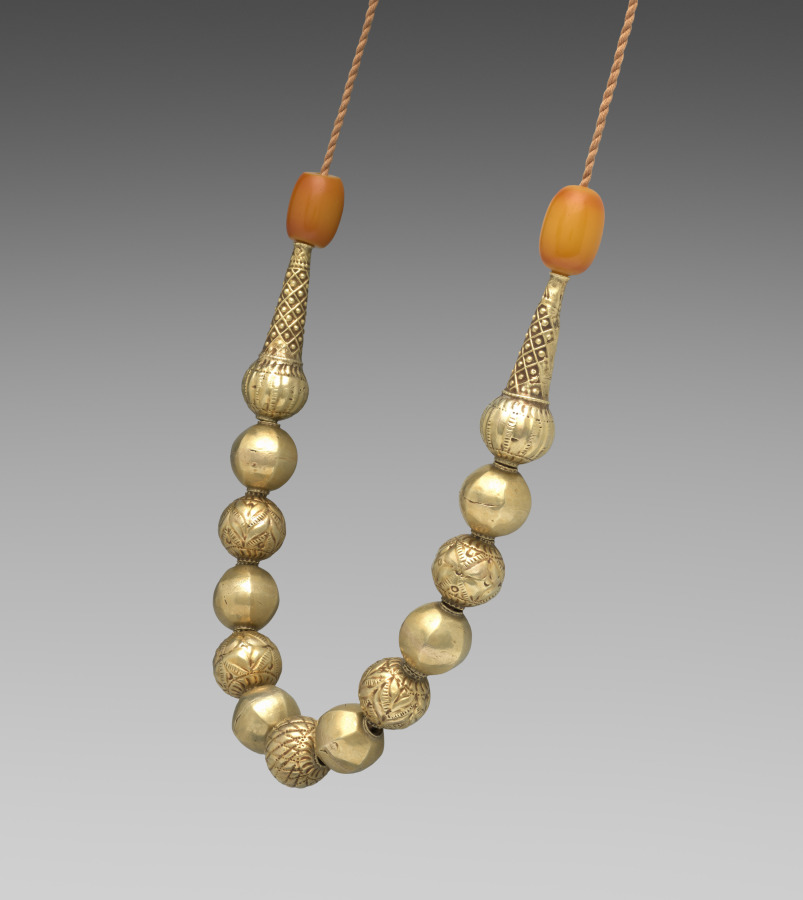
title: Necklace (muriya or murriyya)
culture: Africa, East Africa, probably Harar, Ethiopia, unknown silversmith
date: late 1800s or early 1900s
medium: gilt silver, tree resin (possibly copal)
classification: Jewelry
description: This necklace is from is from the Ethiopian city of Harar, where it was worn only by Muslim women. It was part of the bridal trousseau. The spherical silver beads of this muriya necklace resemble Muslim prayer necklaces. Its warm yellow Baltic amber or Zanzibari copal simultaneously conveyed the wearer’s married status and her access to imported goods. Ornate filigree jewelry was historically made in Ethiopia for royals and nobility by specialized silversmiths trained through long apprenticeships. Customers were generally female, while silversmiths are always male.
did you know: Besides archaeological examples, the oldest known Ethiopian jewelry dates from the 1840s; damaged items were typically melted down to make new pieces or to use during times of hardship.